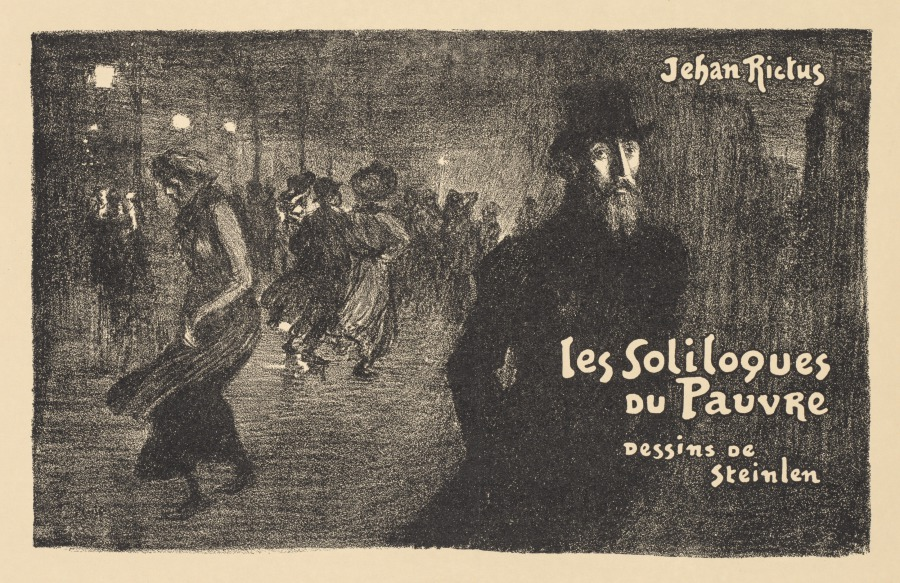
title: Paris by Night (Paris La Nuit)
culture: Switzerland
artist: Théophile Alexandre Steinlen (Swiss, 1859–1923)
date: 1903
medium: lithograph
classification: Print